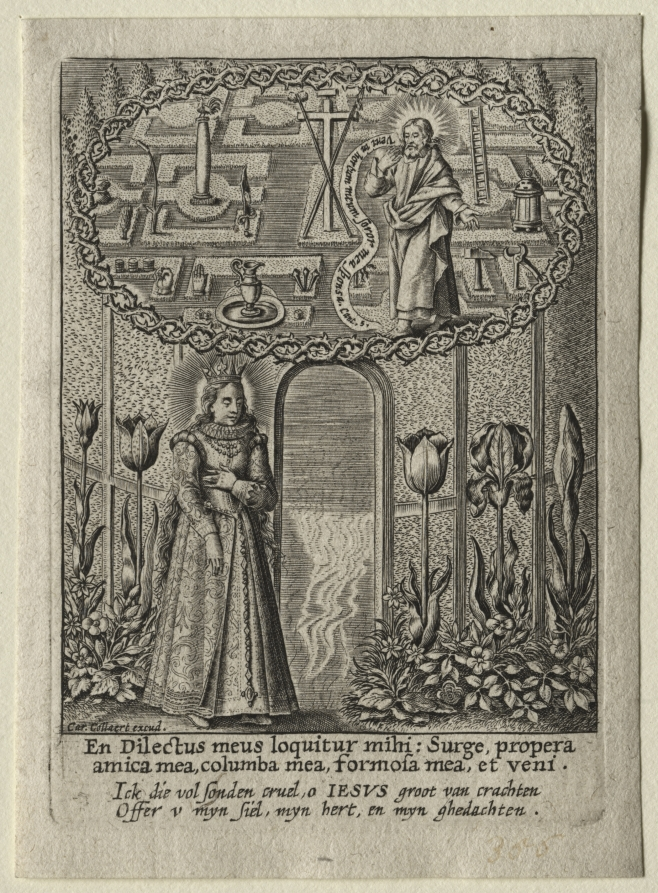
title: Come into my garden, my sister, my wife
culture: Flanders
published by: Carel Collaert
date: first half 1600s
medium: engraving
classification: Print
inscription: upper center, in plate (in banderole): Veni in horcum meum soror mea sposa. Cant. 5. ; lower left, in plate: Car. Collaert excud. ; across botton, in plate: En Dilectus meus loquitur mihi: Surge, propera / amica mea, columba mea, formosa mea, et veni. / Ick die vol sonden, cruel, O JESUS groot van crachten / Offer v myn siel, myn hert, en myn ghedachen. ; lower left, in pen and brown ink (faded): 306